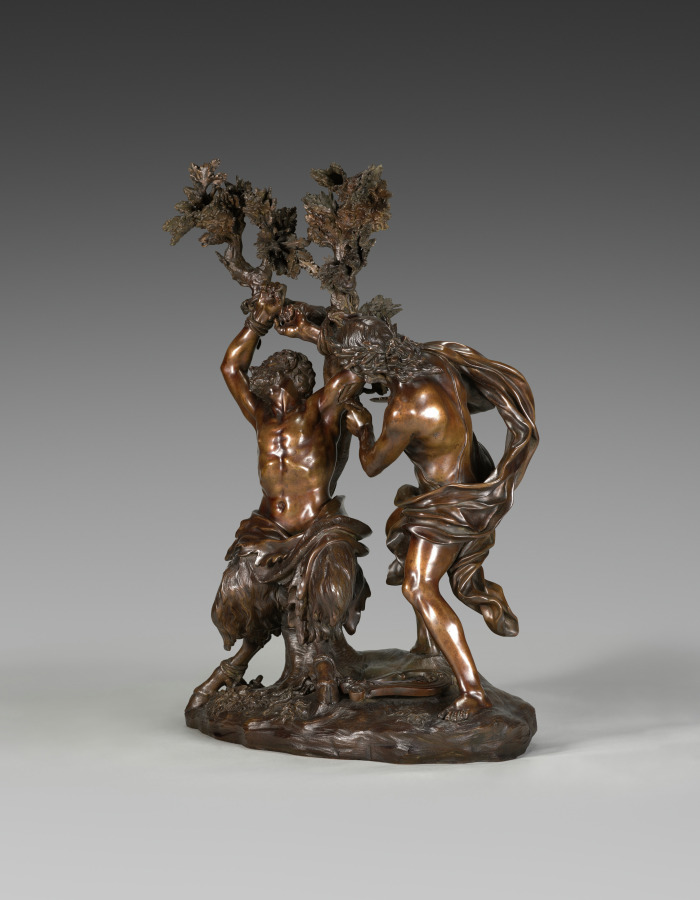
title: Apollo Flaying Marsyas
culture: Italy, Florence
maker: Giovanni Battista Foggini (Italian, 1652–1725)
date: c. 1691–1700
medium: Bronze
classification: Sculpture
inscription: 1136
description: According to myth, the overconfident satyr (half-goat, half-man) Marsyas challenged Apollo, god of the arts, to a musical duel. The defeated Marsyas was tied to a tree and skinned alive in punishment for his pride. Foggini’s bronze captures the moment after Apollo’s victory as the bound Marsyas cries out in agony while the god makes the first incision. The satyr’s anguish is echoed by the gnarled branches; Apollo’s wrath is manifested in his billowing drapery.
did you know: The lyre with which Apollo outperformed Marsyas can be seen between his feet, cast down upon his victory.